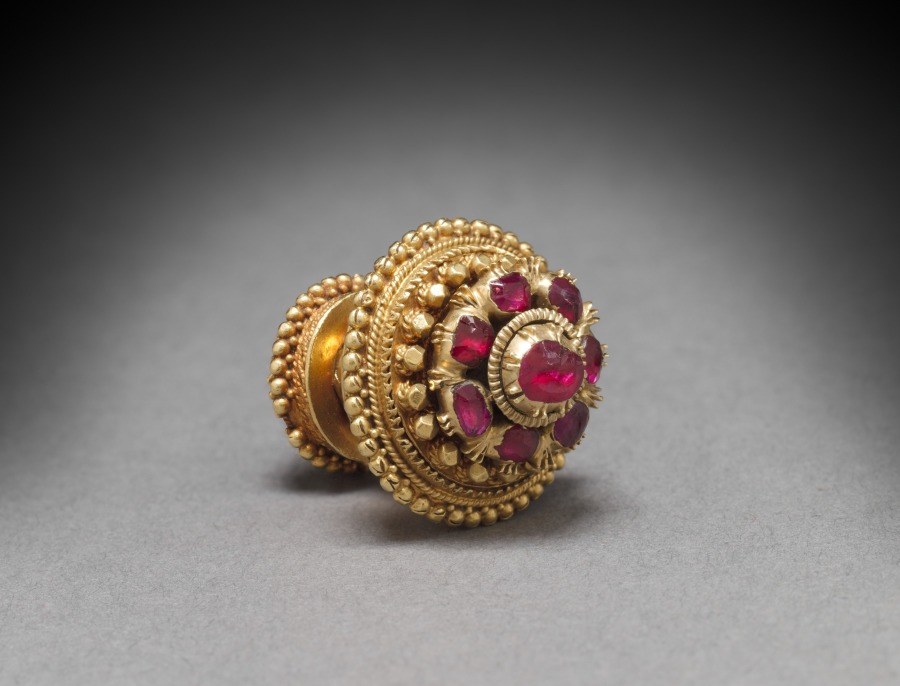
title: Ear Stud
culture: Burma (?)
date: 1800s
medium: gold and rubies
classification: Jewelry